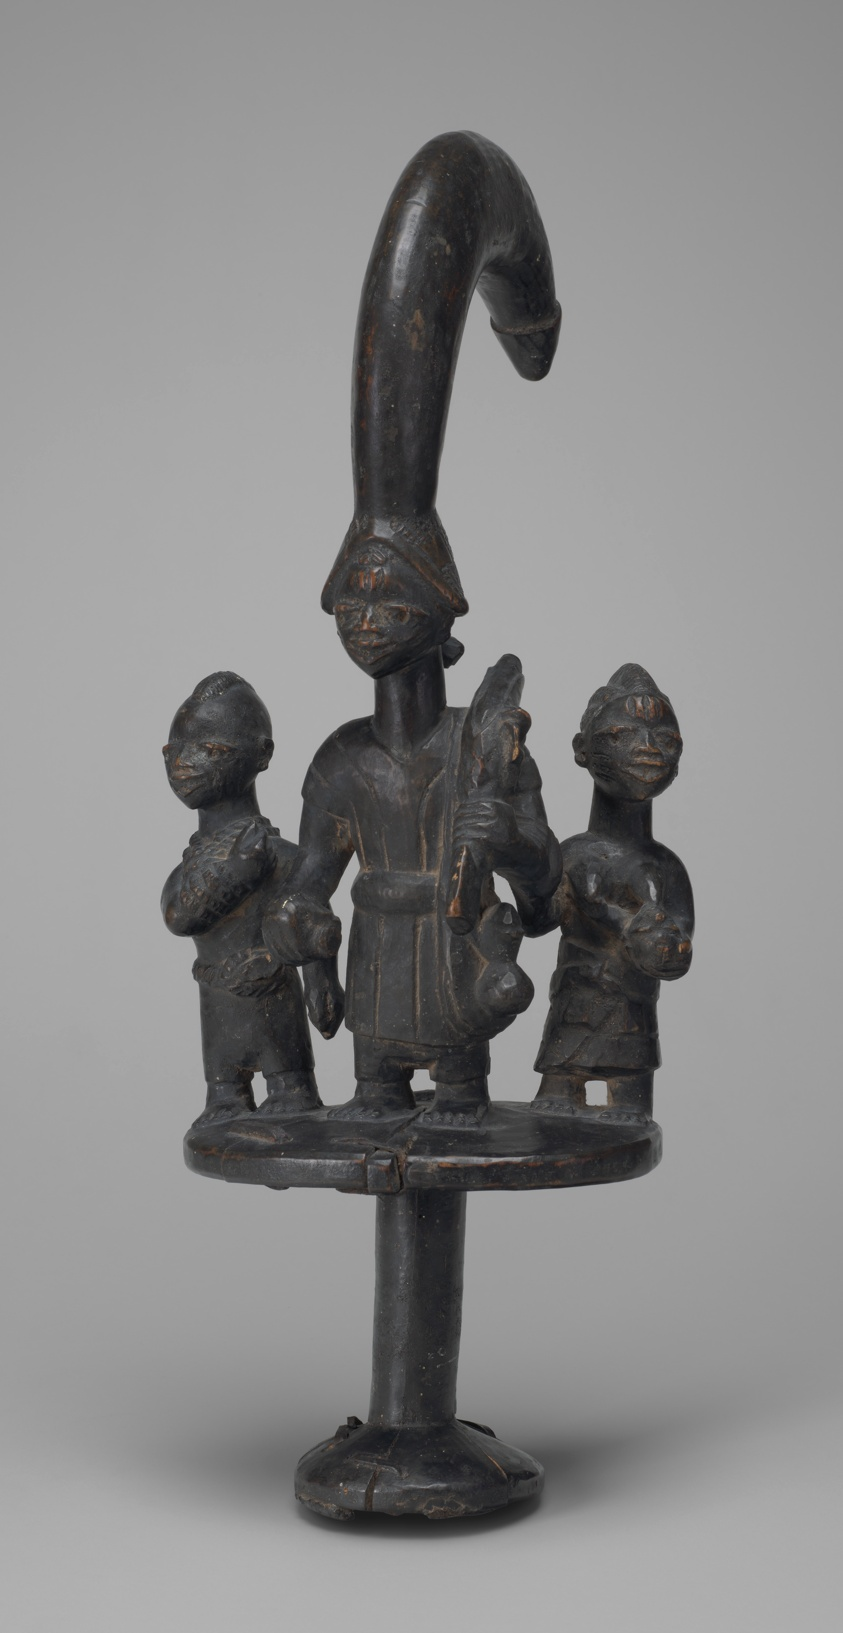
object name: Sculpture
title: Esu Dance Staff (Ogo Elegbara)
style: yoruba, Arts of Africa, Coastal West Africa, african Art, ketu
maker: Attributed to an unidentified Ketu master (active mid-19th century); Yoruba; Nigeria; Coastal West Africa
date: Mid–late 19th century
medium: Wood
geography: Nigeria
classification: sculpture; wood; arts of Africa; ceremonial object; african art; ritual objects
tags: warriors, captive, mother and child, messenger, dance, performance, supernatural, war, staffs